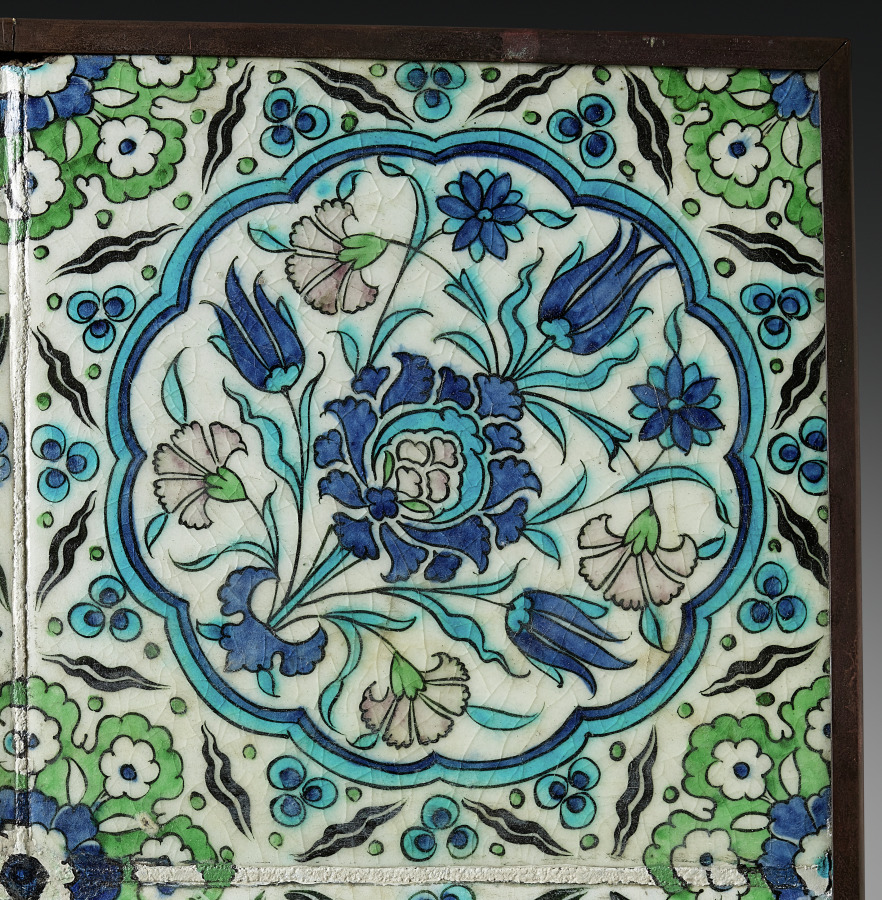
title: Wall Tile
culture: Turkey (Iznik), Ottoman Period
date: 1600s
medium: fritware with underglaze-painted design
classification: Ceramic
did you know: Iznik is a town on the eastern shores of Lake Iznik, in northwestern Turkey.